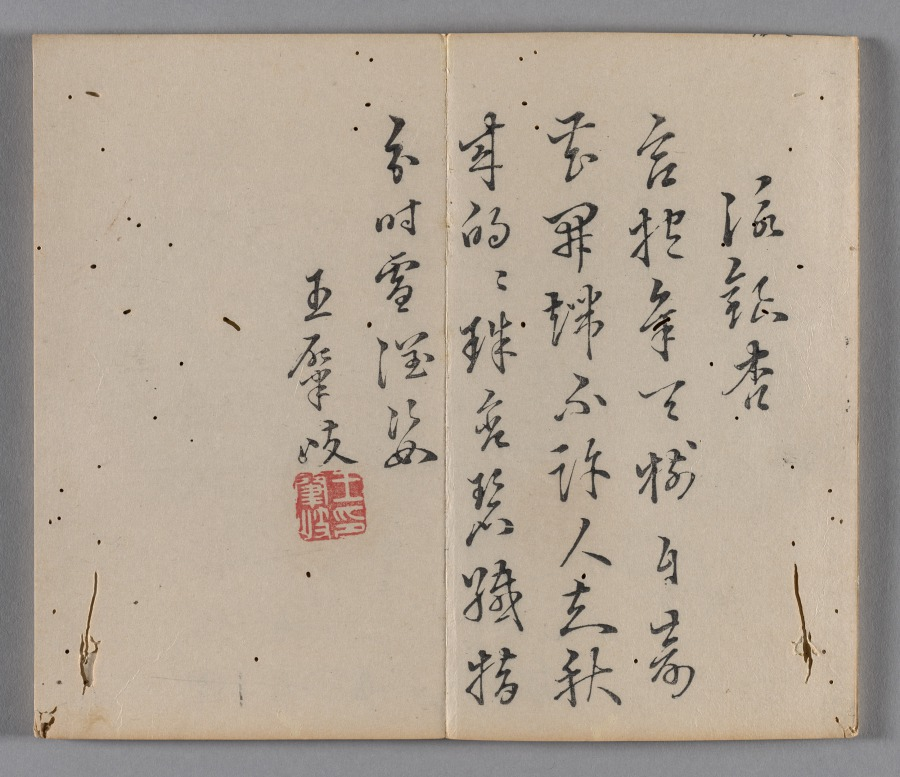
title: Ten Bamboo Studio Painting and Calligraphy Handbook (Shizhuzhai shuhua pu): Fruit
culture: China, Qing dynasty (1644-1911)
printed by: Hu Zhengyan (Chinese, c. 1584–1674)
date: 1633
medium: Woodblock-printed book; ink and colors on paper; first edition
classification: Print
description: Color printing reached a level of perfection in the early 1600s, as seen in this Ten Bamboo Studio Collection of Calligraphy and Painting and the Mustard Seed Garden Manual of Painting (printed 1679 and 1701). The painterly quality, precision in registering (aligning) the woodblocks, and harmonious colors made them the most successful color print editions in Chinese history. Both editions were printed and compiled in Nanjing, spread nationwide, and had a great impact on the arts in Japan and Korea.